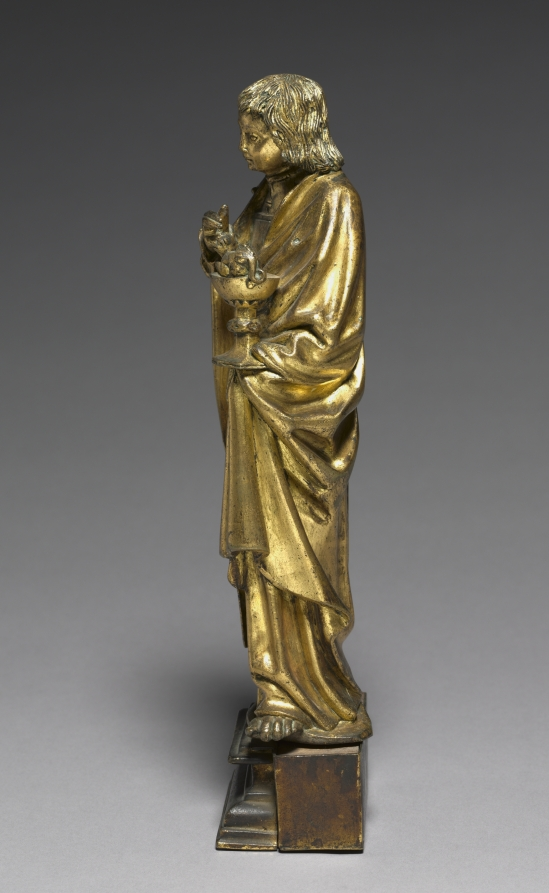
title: Saint John the Evangelist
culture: South Netherlands, probably Malines, 15th century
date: 1450–1475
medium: gilt bronze or brass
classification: Sculpture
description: The saint holds the legendary chalice, a poisoned cup, from which emerges a dragon, representing the serpent (Satan), recalling the incident in which John was forced to drink poison to test the power of his faith. John survived the test unharmed. It has been suggested that this statuette derives from a large multitiered baptismal font with niche figures in the Church of Notre-Dame in the town of Hal.